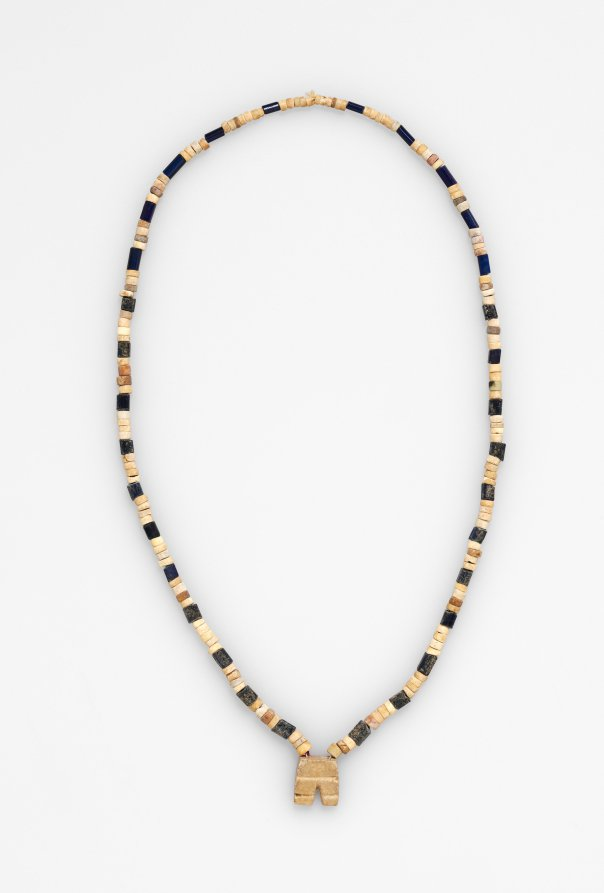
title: Necklace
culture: Peru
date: before 1532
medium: bone and blue beads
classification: Jewelry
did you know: These ancient beads were restrung in modern times.